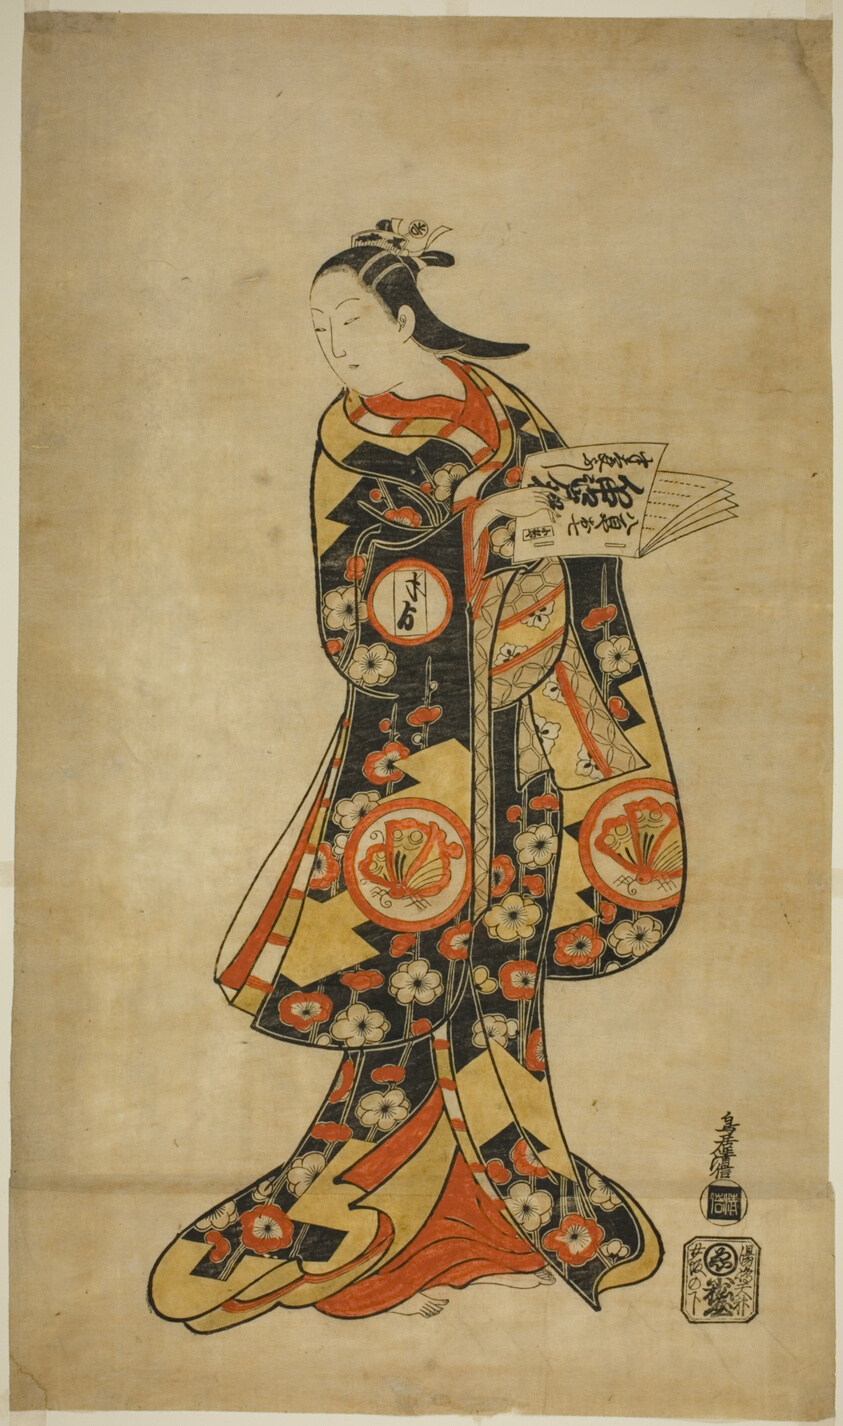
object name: Print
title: The Actor Sanjo Kantaro II as Oshichi in the play "Nanakusa Fukki Soga," performed at the Ichimura Theater in the first month, 1718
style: Japanese (culture or style)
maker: Torii Kiyonobu I (Japanese, 1664-1729)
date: 1718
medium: Hand-colored woodblock print; o-oban, tan-e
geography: Japan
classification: woodblock print; print; asian art